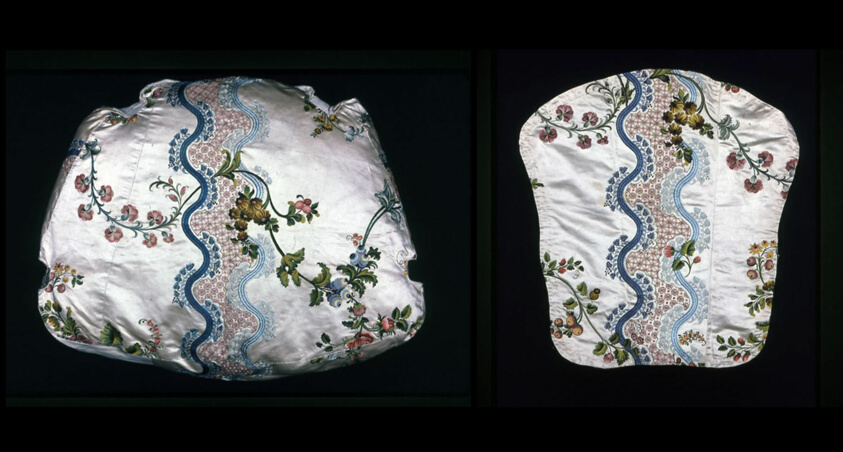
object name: Textile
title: Chair Seat and Back Panel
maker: France or Italy, Turin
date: 18th century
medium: Silk, warp-float faced satin weave; embroidered with silk floss in outline and satin stitches; couching and French knots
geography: France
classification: textile; needlework (visual works)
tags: flowers